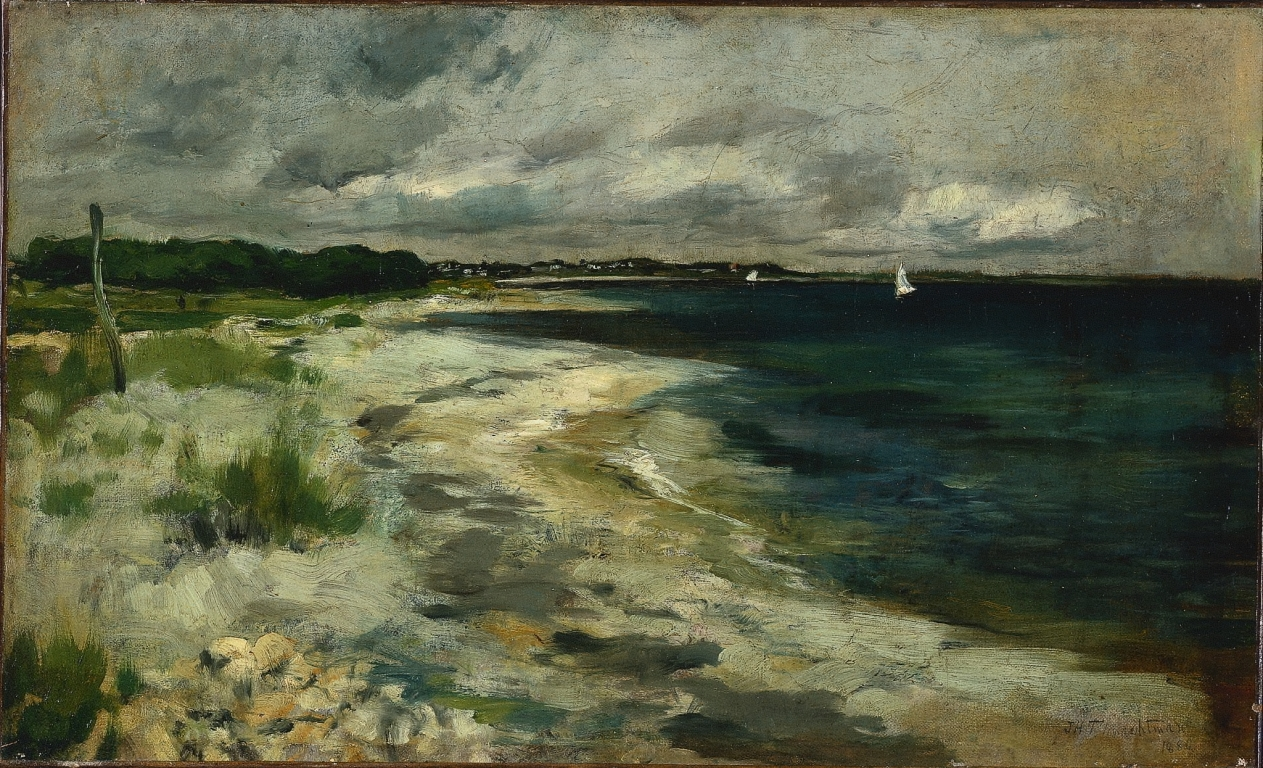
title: Storm Clouds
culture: America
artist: John Henry Twachtman (American, 1853–1902)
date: 1880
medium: oil on canvas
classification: Painting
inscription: Signed lower right: "J H Twachtman / 1880"